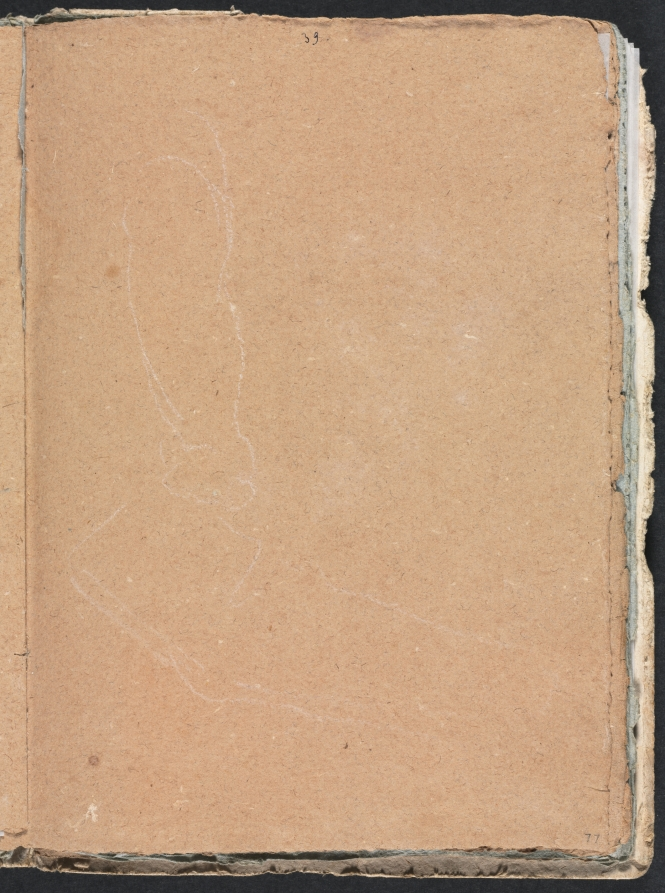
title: Verona Sketchbook: Indecipherable form (page 77)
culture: Italy, 18th century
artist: Francesco Lorenzi (Italian, 1723–1787)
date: 1760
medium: white chalk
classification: Bound Volume